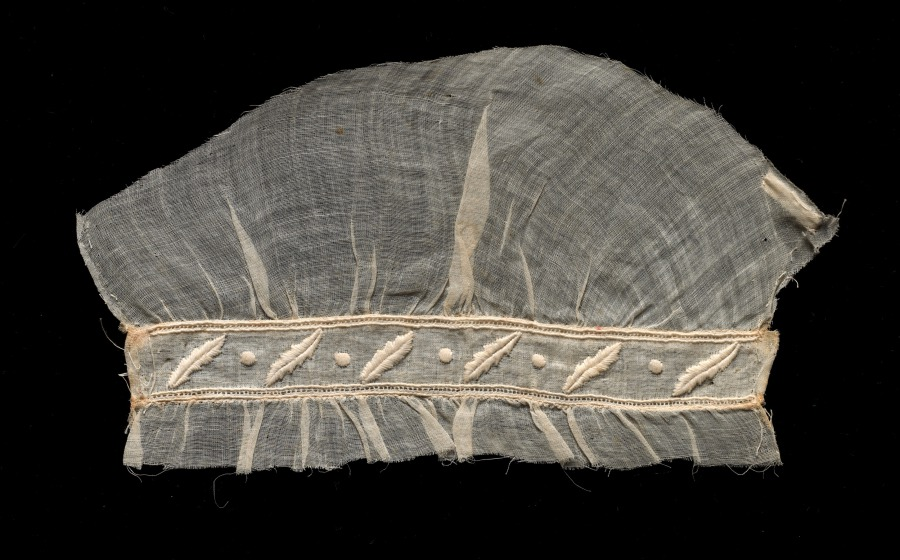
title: Fragment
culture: Spain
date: 1833–68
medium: Plain weave cotton: embroidered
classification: Embroidery